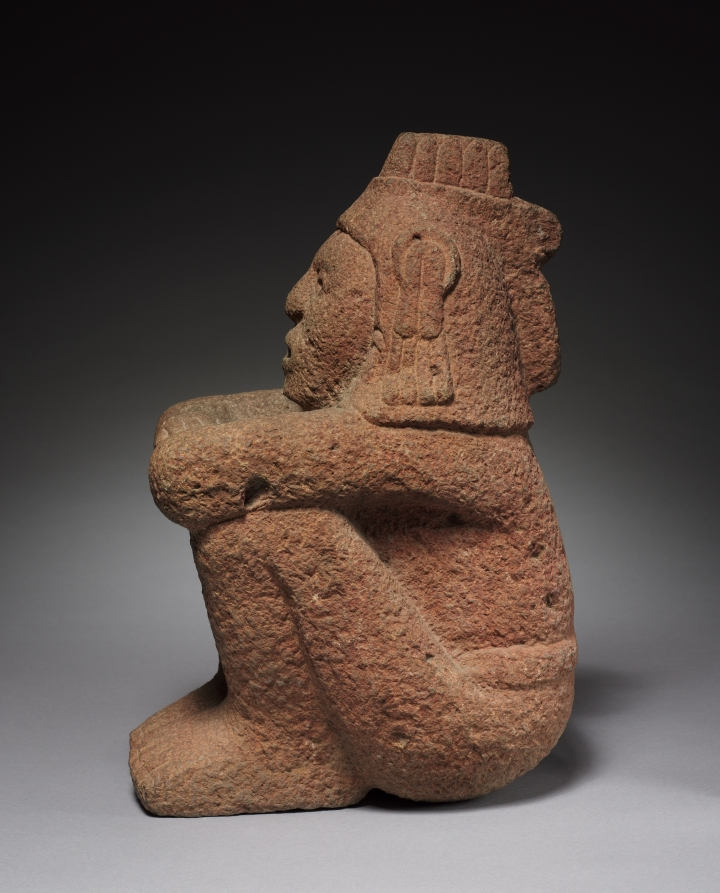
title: Seated Deity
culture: Mexico, Aztec, Valley of Mexico near Teotihuacan, Macuilxochitl (?), 14th-16th century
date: 1350–1519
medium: gray volcanic stone with red pigment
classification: Sculpture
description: The crested headdress with tassels suggests that this youthful, seated male is Macuilxochitl (Five Flower), an Aztec supernatural patron of many forms of pleasure, among them music, dance, feasting, games, and sex. His cult was popular among common people, and this effigy probably was created for use in a small neighborhood temple. The stone surface could have been plastered and then brightly painted.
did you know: The Aztecs associated the number 5 with excess: there were five gods of pleasure, one named “Five Flower.”